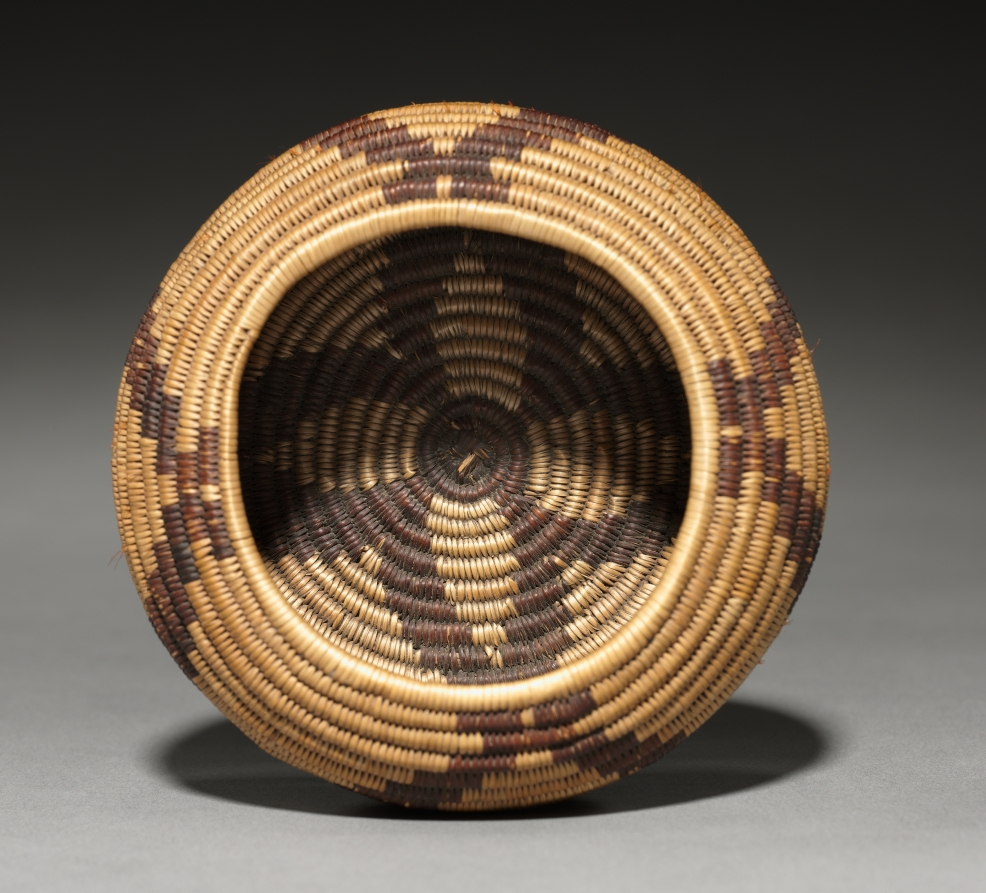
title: Bowl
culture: California, Pomo, Late 19th- Early 20th century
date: 1890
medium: Undyed Bulrush, Sedge; Coiled (3 rods)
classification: Basketry